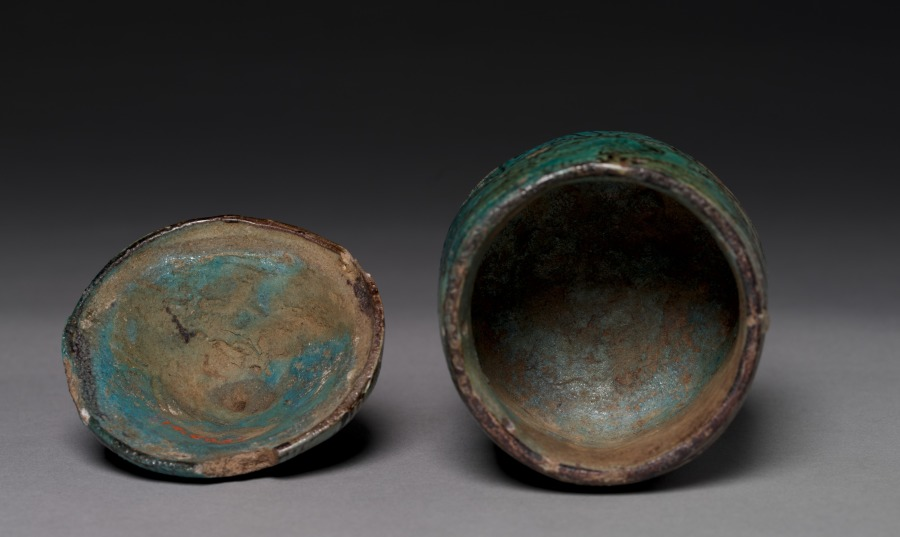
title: Pyxis with Lid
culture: Egypt, Middle Kingdom (2040–1648 BCE)–New Kingdom (1540–1069 BCE)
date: c. 1901–1525 BCE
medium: turquoise faience with black decoration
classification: Vessels